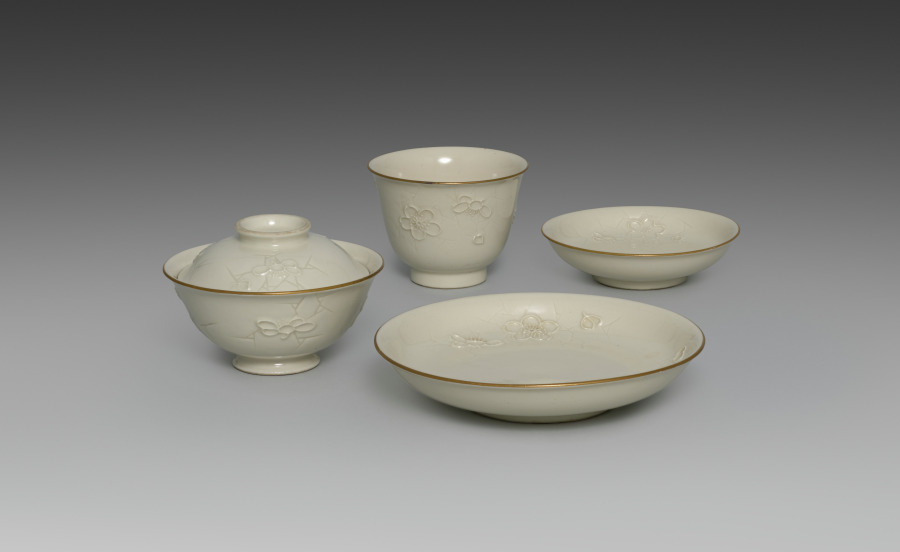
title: Dining Set with Plum Blossoms and Cracked-Ice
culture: Japan, Edo period (1615–1868) to Meiji period (1868–1912)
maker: Seifū Yohei II (Japanese, 1844–1878)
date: 1875–78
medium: Porcelain with molded designs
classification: Ceramic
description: Each item in this set has a delicate low-relief design of flowering plum branches over scattered, intersecting lines meant to resemble the cracked-ice surface of a frozen body of water and is signed on the base in gold pigment. While Yohei II produced many fine works in underglaze blue, like those produced by Kiyomizu Shichibei, he also made works in quite different styles later in his career, from the early 1870 s. In 1873, he was appointed purveyor to the Industrial Center of Kyoto Prefecture, a designation associated with Kyoto’s efforts to reach an international market through the port of Kobe; and from 1875 until his death, he was involved in national-level projects to present Japanese ceramics across the world. It was during this period that Yohei III was apprenticed to Yohei II, and it has been suggested that this set may in fact be an early example of Yohei III’s work, which he signed with his teacher’s name. Decorated with flowers resembling Japanese textile motifs, the set calls to mind the design of Yohei II’s pair of vases with plum blossoms in the Victoria and Albert Museum. Here, the elaborate trees created for a formal public exhibition setting have been translated into the approachable blossoms of the genteel domestic environment. While the designs are consistent across the pieces, each raised flower petal and pistil and each incised line in the ice was done by hand, so the cups, bowls, and dishes are similar yet unique. The bottoms of two boxes once identified the set’s owner, but the information has been deliberately obscured with black ink. However, inscriptions still visible appear to indicate two occasions, once at the end of July 1886 , and once again in June 1916 , when parts of the set were requested from Hokura in Niigata Prefecture. The location corresponds to a neighborhood in the present-day city of Jōetsu. The surname Tsuji 辻 also appears on a paper tag affixed to one of the box cloths. Future research may possibly reveal more about their provenance. A vase by Yohei III in a private collection combines the formal grandeur of the Yohei II vases in the Victoria and Albert Museum with the gentler design of this dining set, placing flowering plum trees against soft, scalloped-edge clouds resembling those in golden screens.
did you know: The dining wares have a creamy white coloration that the four boxes containing them identify as Korean in style.